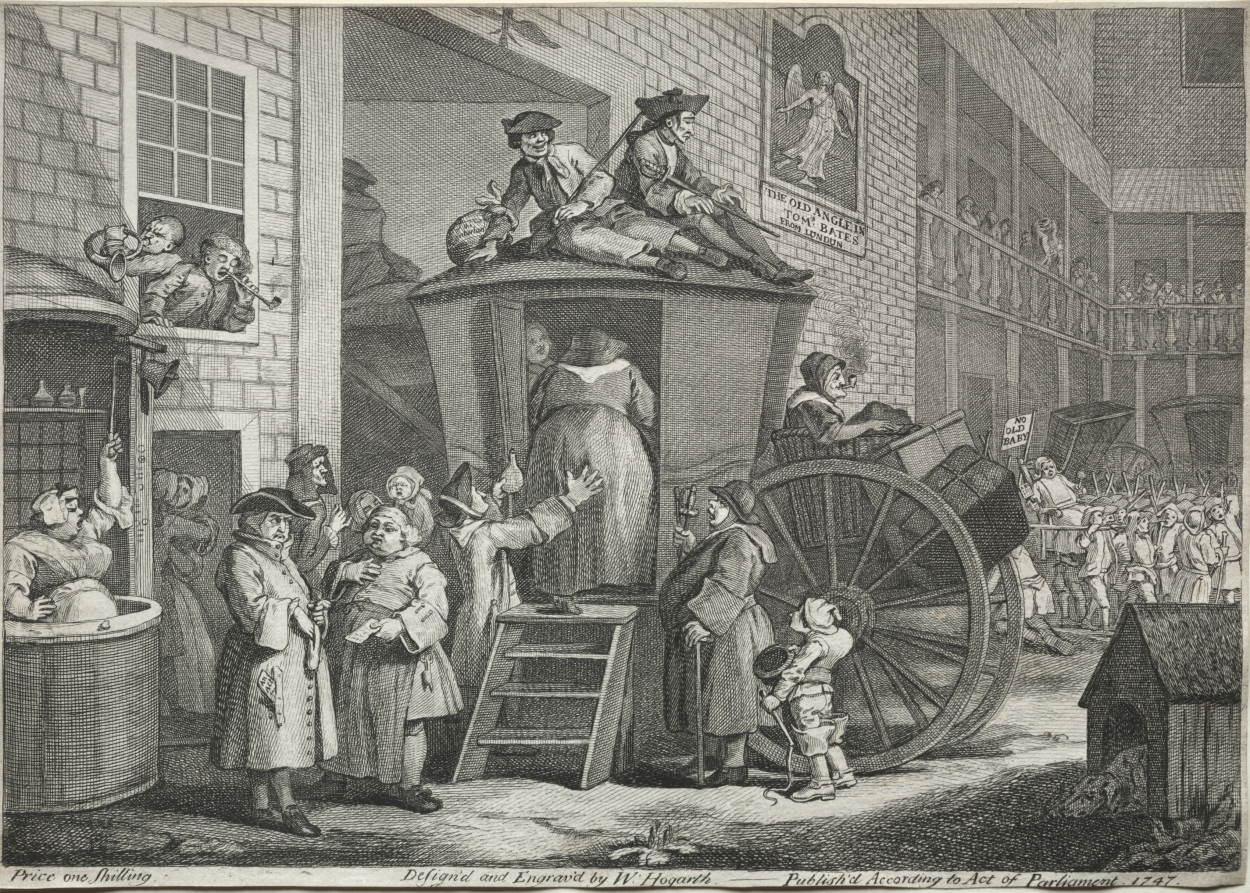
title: The Stage Coach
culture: England, 18th century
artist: William Hogarth (British, 1697–1764)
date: 1747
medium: etching and engraving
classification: Print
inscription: inscribed in lower margin of plate, below image: Price one Shilling (l.l.); designed and engraved by W. Hogarth (l.c.), ---Published According to Act of Parliment. 1747 (l.r.)